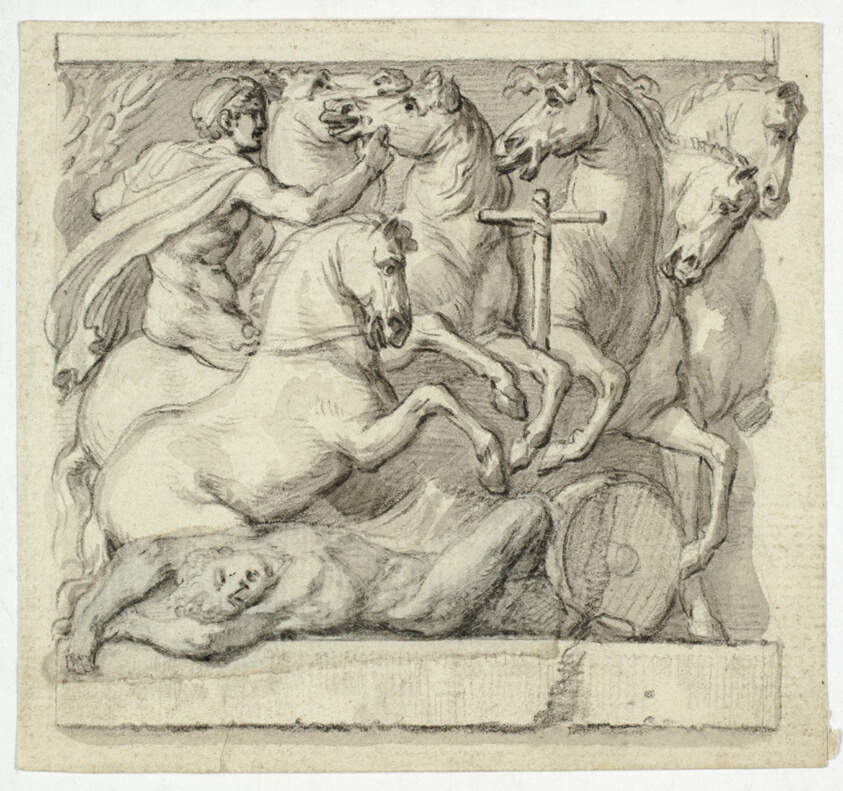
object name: Drawing and Watercolor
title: Copy after Sarcophagus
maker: Unknown Artist; French, 1701-1800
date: 1701-1800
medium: Drawing on paper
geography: France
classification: drawings (visual works); prints and drawing